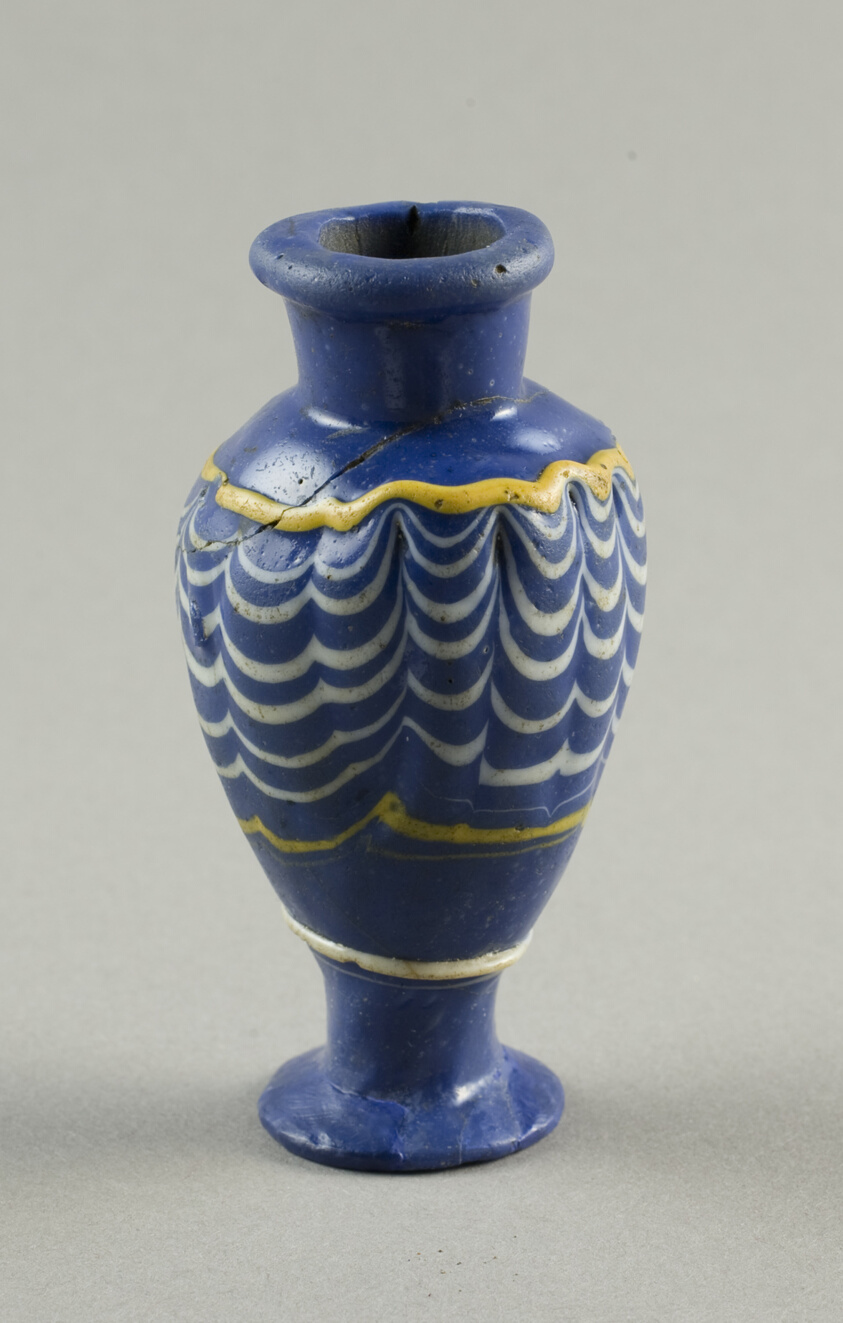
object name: Vessel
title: Vase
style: egyptian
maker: Egyptian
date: Dynasty 18-19 (about 1550-1186 BCE)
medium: Glass, core-formed technique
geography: Egypt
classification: glass; vessel; ancient art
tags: vase